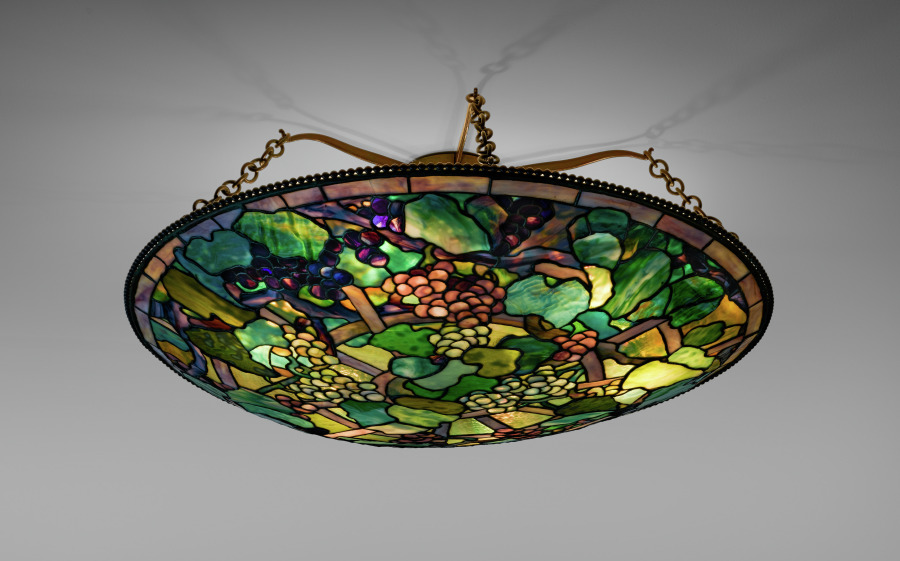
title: Grape Trellis Hanging Shade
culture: America, New York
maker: Tiffany Studios (United States, New York, 1902–32)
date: c. 1905–10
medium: Leaded glass, bronze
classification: Glass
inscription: TIFFANY STUDIOS/NEW YORK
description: In the 1870s a renewed emphasis on natural landscapes ushered in a generation of cottage gardeners who delighted in planting perennials in large quantities. Louis Comfort Tiffany was among those who championed the lush, sometimes wild-looking displays of varied floral species in the garden at his Long Island estate, Laurelton Hall. Tiffany encouraged his designers to take inspiration from his garden by shipping fresh cuttings almost weekly to his studios. Ohio native Clara Wolcott Driscoll and her team of female designers created floral patterns for lamps and mosaics based on the colorful blooms of spring that became among the most sought after and commercially successful of Tiffany’s production.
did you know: This pendant fixture was designed to be hung close to the ceiling to simulate a grape arbor.